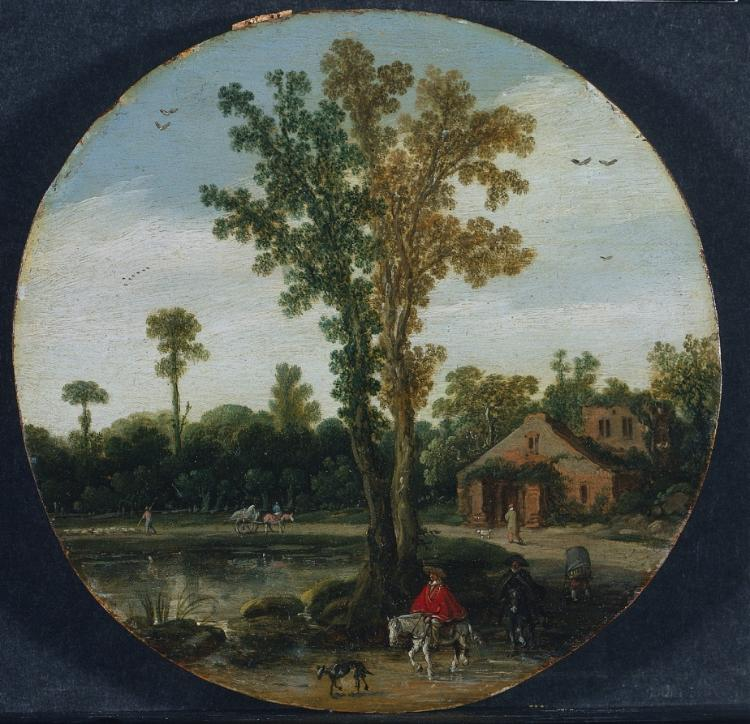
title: Travelers by a Lake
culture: Netherlands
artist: Esaias van de Velde (Dutch, 1587–1630)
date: 1625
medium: oil on wood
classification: Painting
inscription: signed lower center: E.V. Velde. / 1625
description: Prior to the early 1600s, Dutch artists typically painted landscapes as idealized or artificial backdrops to decorate the more important religious or mythological narratives they included. A revolution in landscape painting occurred in Haarlem in the 1610s when artists like Esaias van de Velde started to paint the humble and everyday subjects of the land and people of the Netherlands in convincingly naturalistic detail. The river view was a subject that van de Velde developed in the 1620s. While the water is subordinate to the other elements, its stillness reinforces the serenity of the environment, as do the figures and ruins that exist in in harmony with the natural world. Although van de Velde would have made sketches outdoors, the painting itself was not a copy of these sketches. Rather, as was the common practice, van de Velde would carefully construct paintings in his studio, using a combination of sketches and memories as his inspiration. For its owner, this picture would have satisfied an urban patron's nostalgia for the humble countryside, particularly in light of the rapid urbanization of Dutch society after their independence from Spain in 1609.